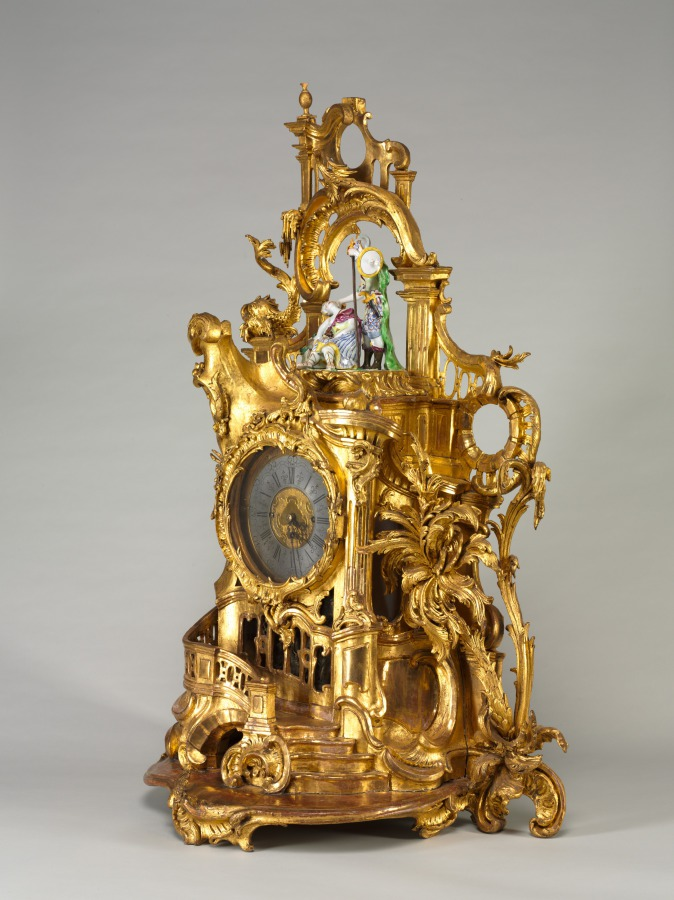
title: Clock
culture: Germany, 18th century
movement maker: Baumgartinger (German)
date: c. 1750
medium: carved and gilded wood, faience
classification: Furniture and woodwork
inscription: inscribed on face: Baumgartnger [sic] Mergentheim.